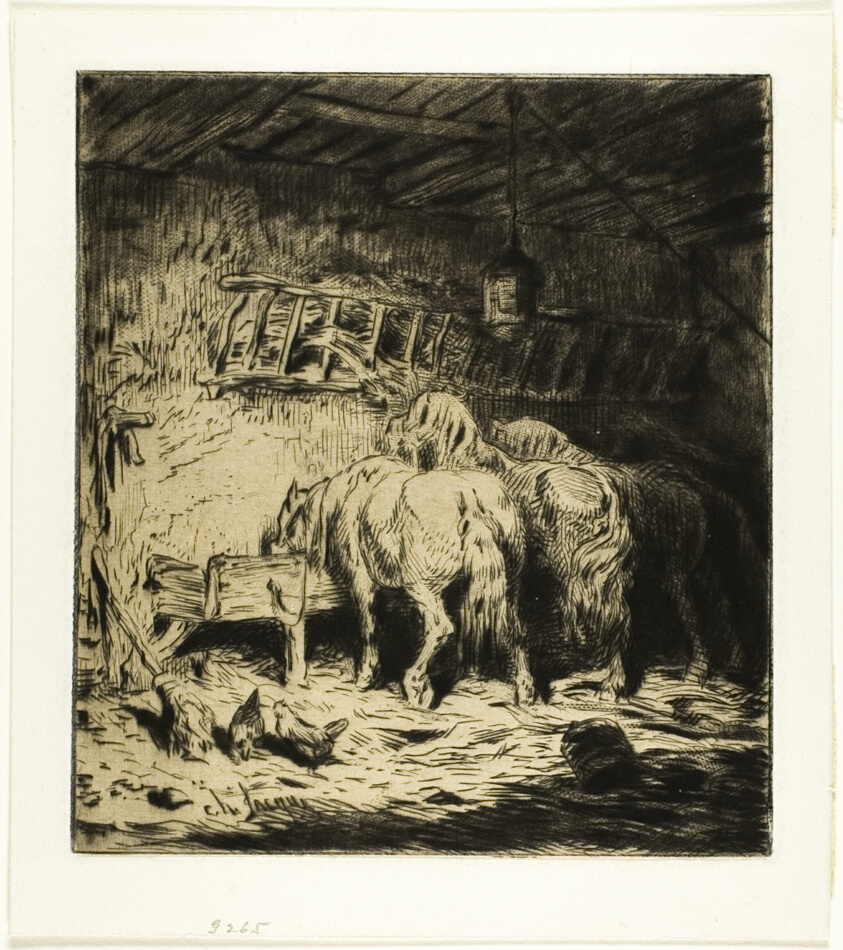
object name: Print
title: Stable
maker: Charles Émile Jacque (French, 1813-1894)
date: 1848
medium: Drypoint and roulette on ivory wove paper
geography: France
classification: etching; print; prints and drawing